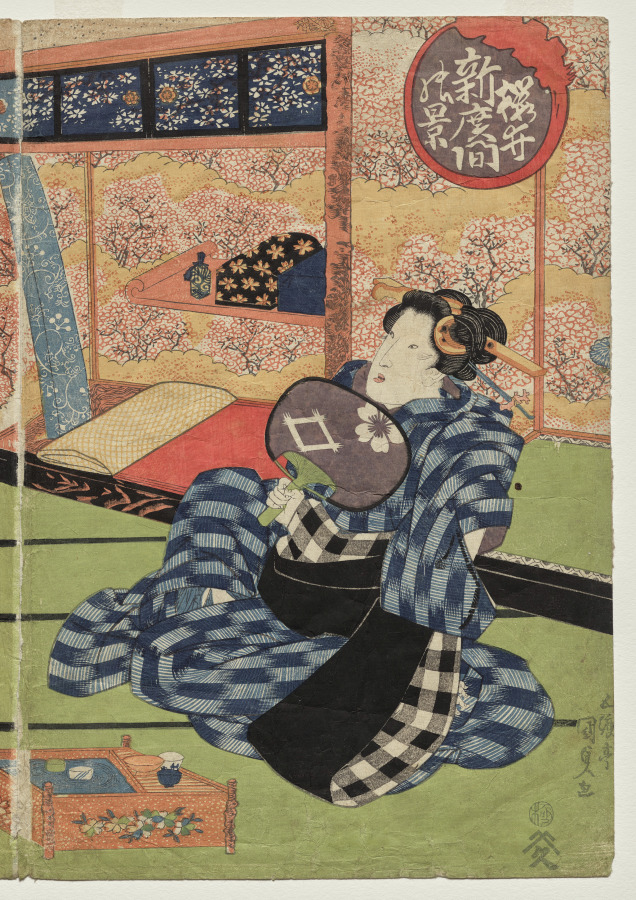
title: A View of the Large New Room at Sakurai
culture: Japan, Edo period (1615–1868)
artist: Utagawa Kunisada (Japanese, 1786–1865)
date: early or mid 1830s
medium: color woodblock print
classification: Print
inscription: Signature: Gototei Kunisada ga Publisher: Yamamotoya Keikichi (emblem) Censorship Seal: kiwame